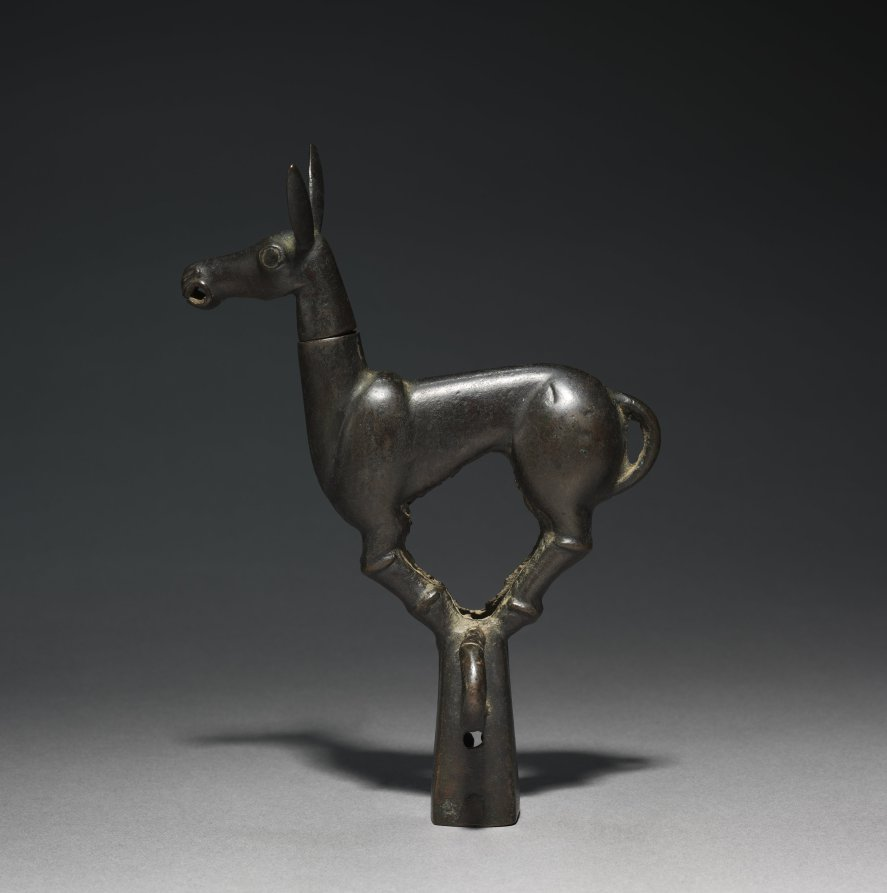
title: Pole Top as a Wild Ass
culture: China, Ordos Region, Han dynasty (202 BCE–220 CE)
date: 206 BCE–220 CE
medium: bronze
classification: Sculpture